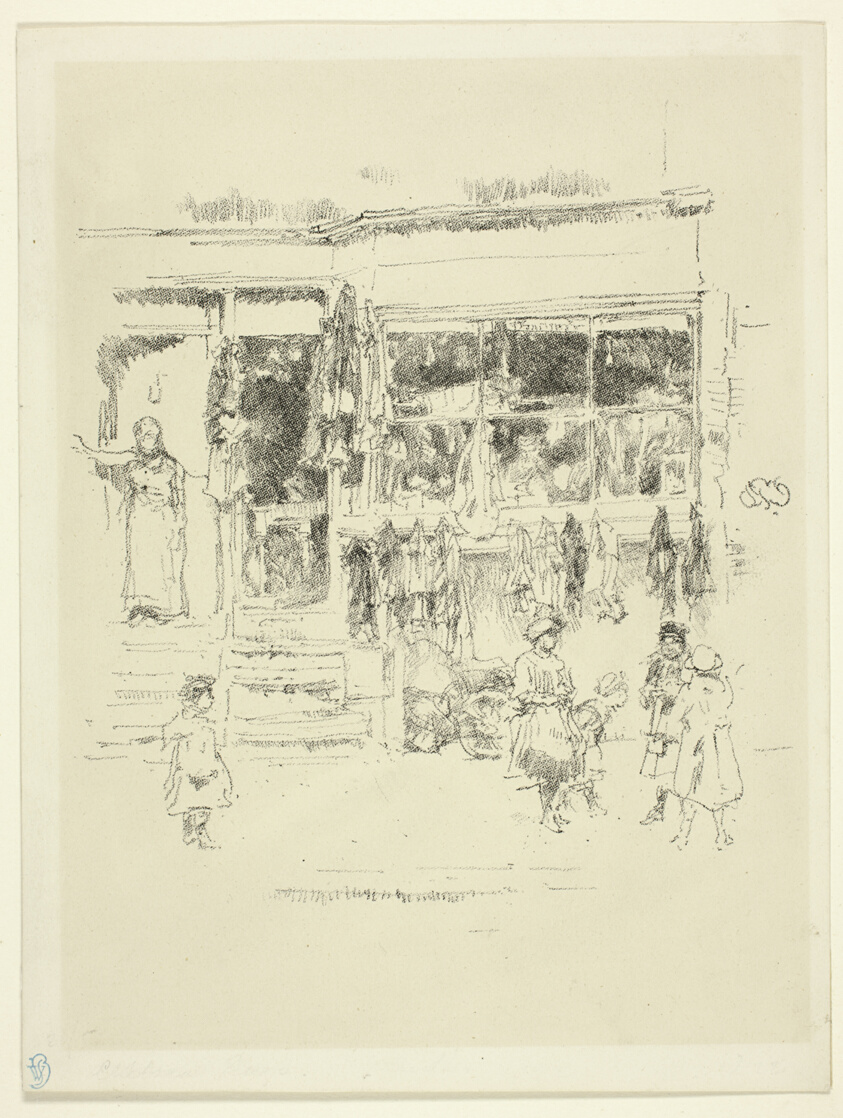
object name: Print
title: Chelsea Rags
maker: James McNeill Whistler (American, 1834-1903)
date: 1888, published 1892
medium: Transfer lithograph in black on cream wove paper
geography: United States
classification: transfer lithograph; lithograph; print; prints and drawing; paper